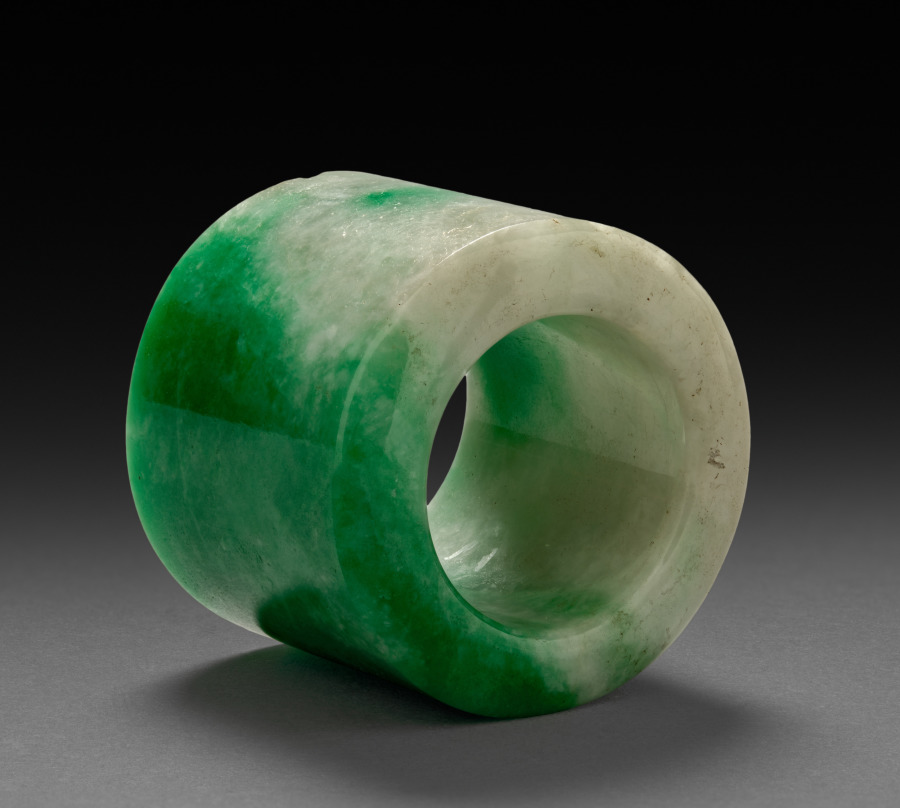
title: Thumb Ring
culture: China, Qing dynasty (1644-1911) or Republican period (1912-49)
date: 1800s–1900s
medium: green and white jade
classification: Jewelry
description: Jade rings were worn by men on the thumb of the right hand to assist with holding and pulling the string of the archer’s bow. However, thumb rings were also fashionable accessories for civil officials in the late Qing dynasty.